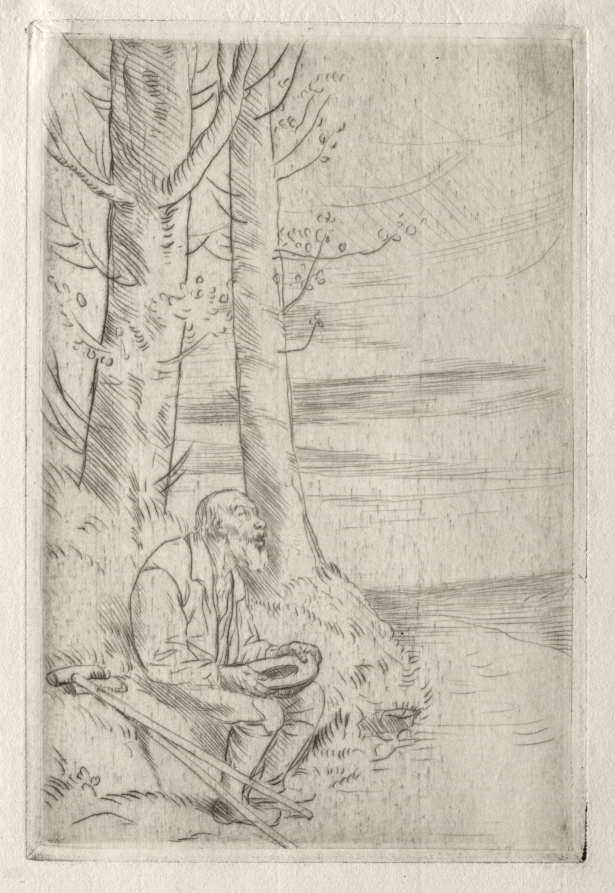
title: The Blind Beggar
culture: France, 19th century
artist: Alphonse Legros (French, 1837–1911)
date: c. 1857–1911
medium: drypoint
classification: Print